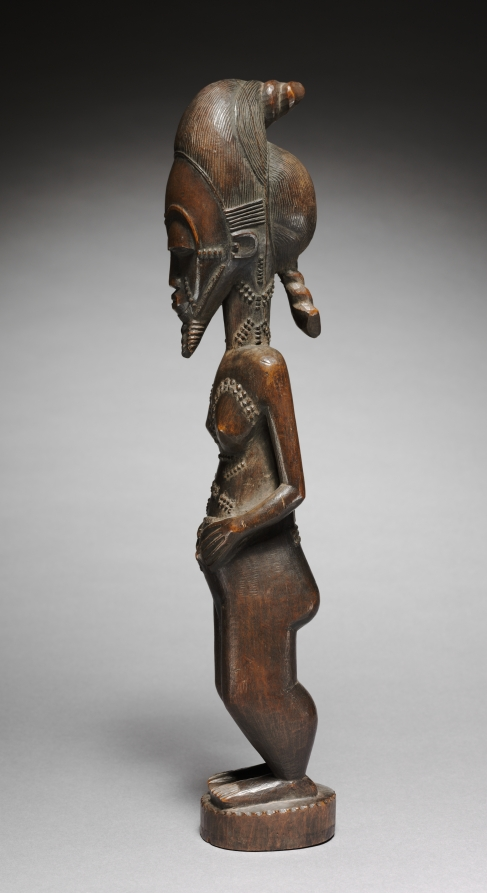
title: Male Figure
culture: Africa, West Africa, Côte d'Ivoire, Baule peoples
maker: Totokro Master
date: by 1931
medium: wood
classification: Sculpture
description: Purported to be the earliest surviving work by a Baule carver who art historians have dubbed the "Totokro Master," this Male Figure typically comes as a pair of male and female sculptures, and serves as a bridge between the spirit (asye usu) and human worlds in the hand of Baule diviners. Representing idealized humans in their prime, the diviners consider them suitable forms used to cast out disruptive spirits. It is featured here without the female example. The African Art Sponsors—a group of donors associated with Cleveland’s Karamu House, the oldest African American theater group in the country—purchased this Baule male figure in 1929 and donated it to the museum in 1931.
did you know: In Baule society, the name of the artist who made a sculpture is not always public knowledge. In 1999, art historian Susan Vogel gave the sculptor of this work and others similar in style the nickname "Totokro Master" for the geographic region they came from.